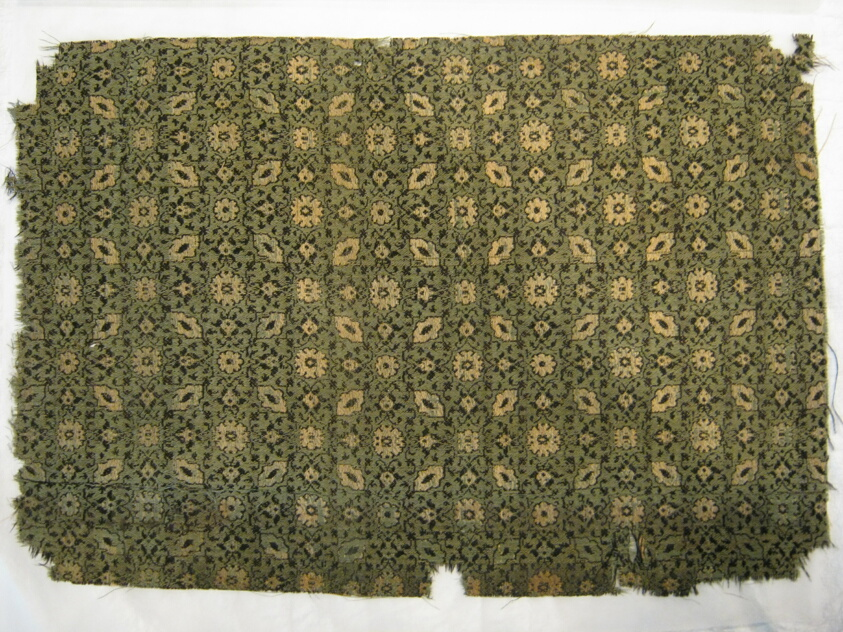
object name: Textile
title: Fragment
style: meiji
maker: Japan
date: late Edo period (1789–1868)/ Meiji period (1868–1912), 1850/1900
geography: Japan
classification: textile; weaving